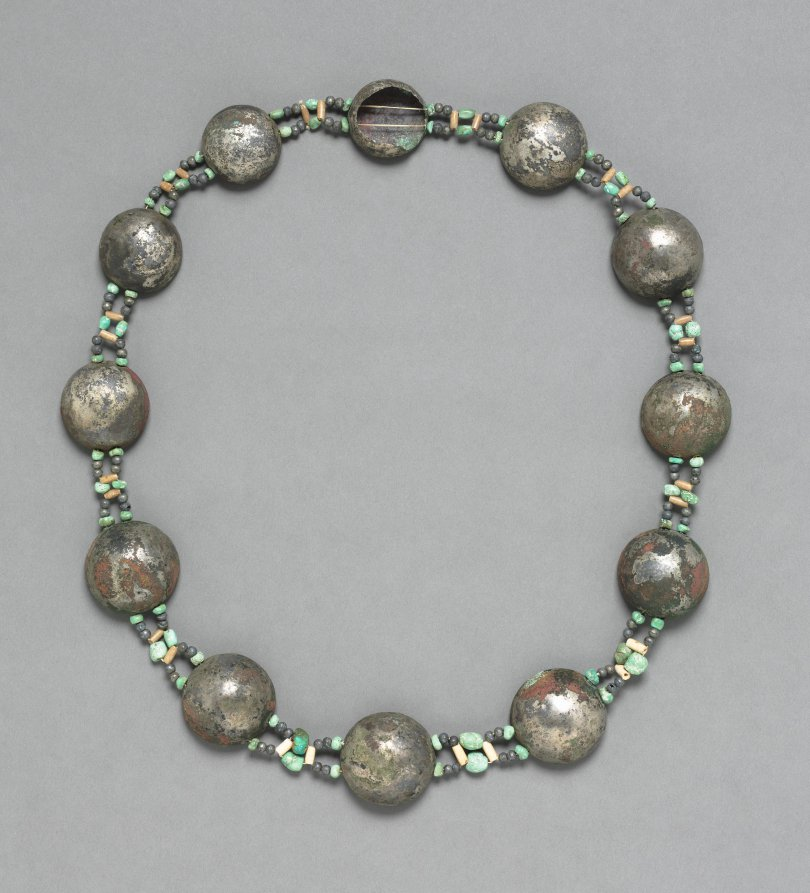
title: Necklace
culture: Peru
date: before 1532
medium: silver and turquoise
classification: Jewelry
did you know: These ancient beads were restrung in modern times.